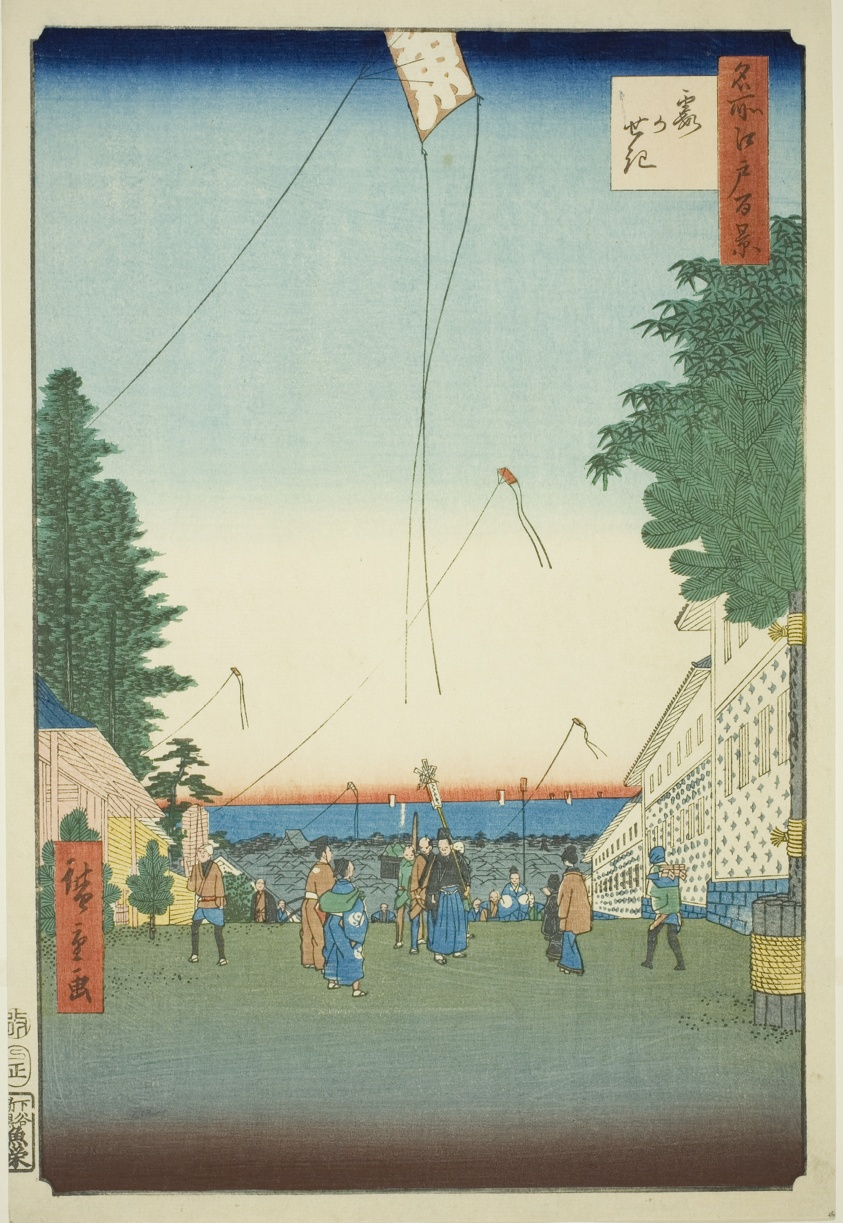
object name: Print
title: Kasumigaseki, from the series "One Hundred Famous Views of Edo (Meisho Edo hyakkei)"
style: Japanese (culture or style)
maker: Utagawa Hiroshige 歌川 広重; Japanese, 1797-1858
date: 1857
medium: Color woodblock print; oban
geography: Japan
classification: woodblock print; print; asian art